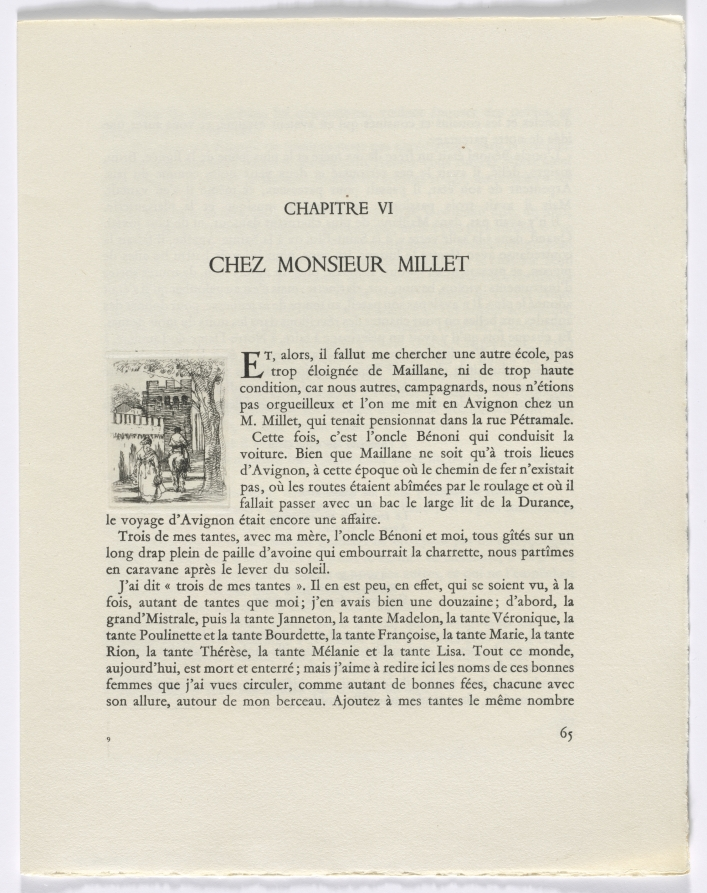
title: Frédéric Mistral: Mémoires et Recits by Frédéric Mistral: woman and man on horse (page 65)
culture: France, 20th century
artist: Auguste Brouet (French, 1872–1941)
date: 1937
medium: etchings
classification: Portfolio